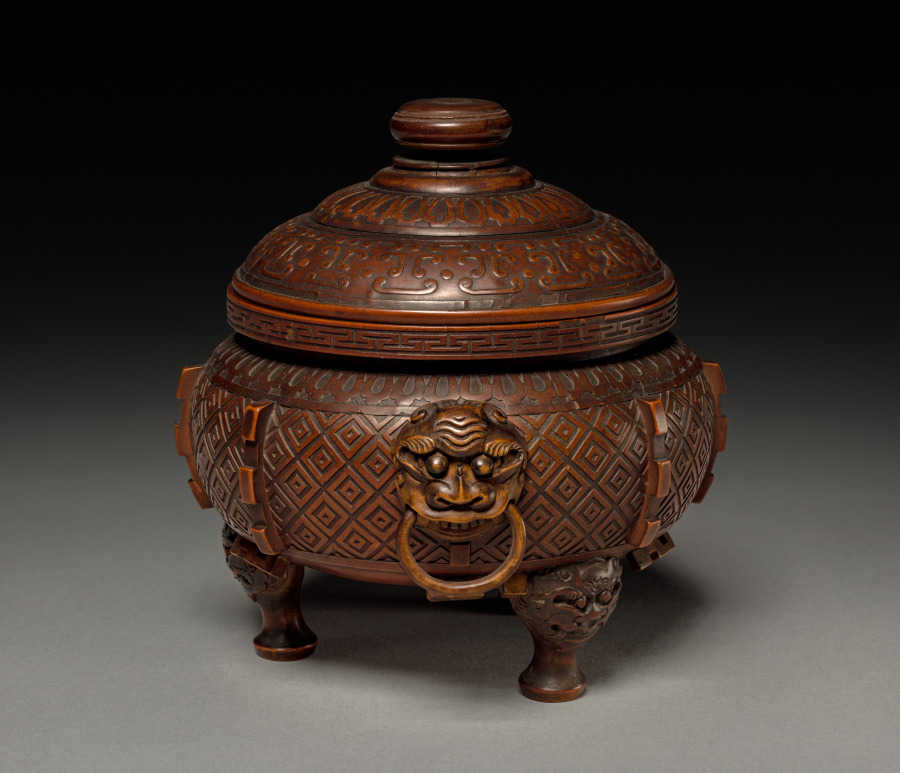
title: Tripod with Cover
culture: China, Qing dynasty (1644-1911)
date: late 1700s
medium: carved wood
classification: Wood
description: In the Qing (1644–1911) dynasty, luxury items became more affordable to larger parts of the society, including women, merchants, and literati in non-official positions. Imperial patronage and a growing urban population encouraged consumption of luxury goods and local craftmanship. This wooden tripod illustrates superb carving skills and the creative mind of the skilled artisan who sought clients on a competitive market.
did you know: Each leg of the tripod is decorated with a lion head.